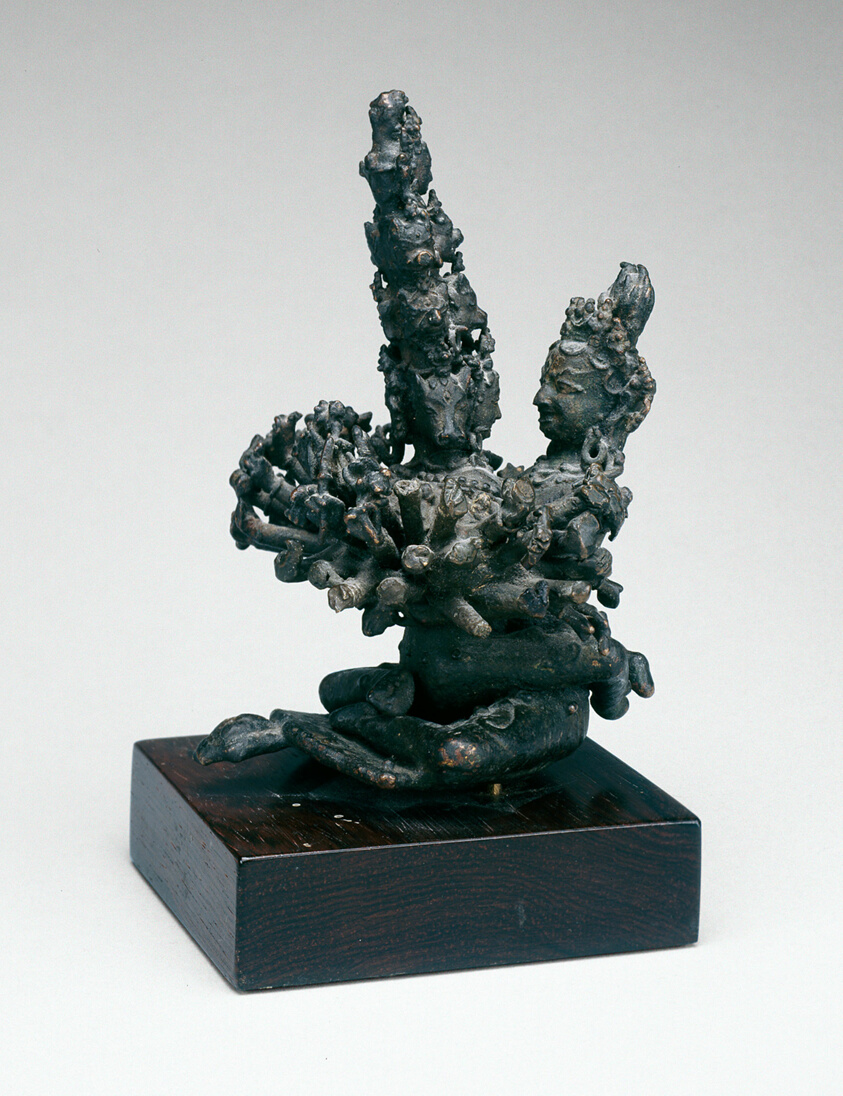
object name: Sculpture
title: Tantric Goddess Kamakala and Spouse in Ritual Embrace (yab-yum)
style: Himalayan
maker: Nepal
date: 14th/15th century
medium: Bronze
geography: Nepal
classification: bronze; metal; sculpture; asian art